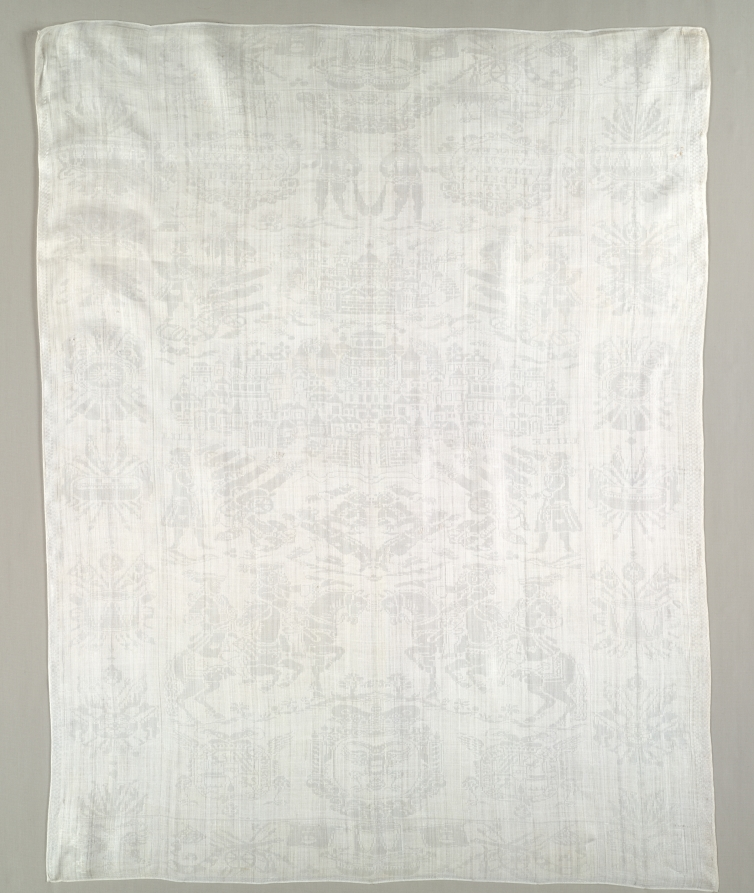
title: Napkin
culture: Flanders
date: c. 1675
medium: damask: linen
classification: Textile